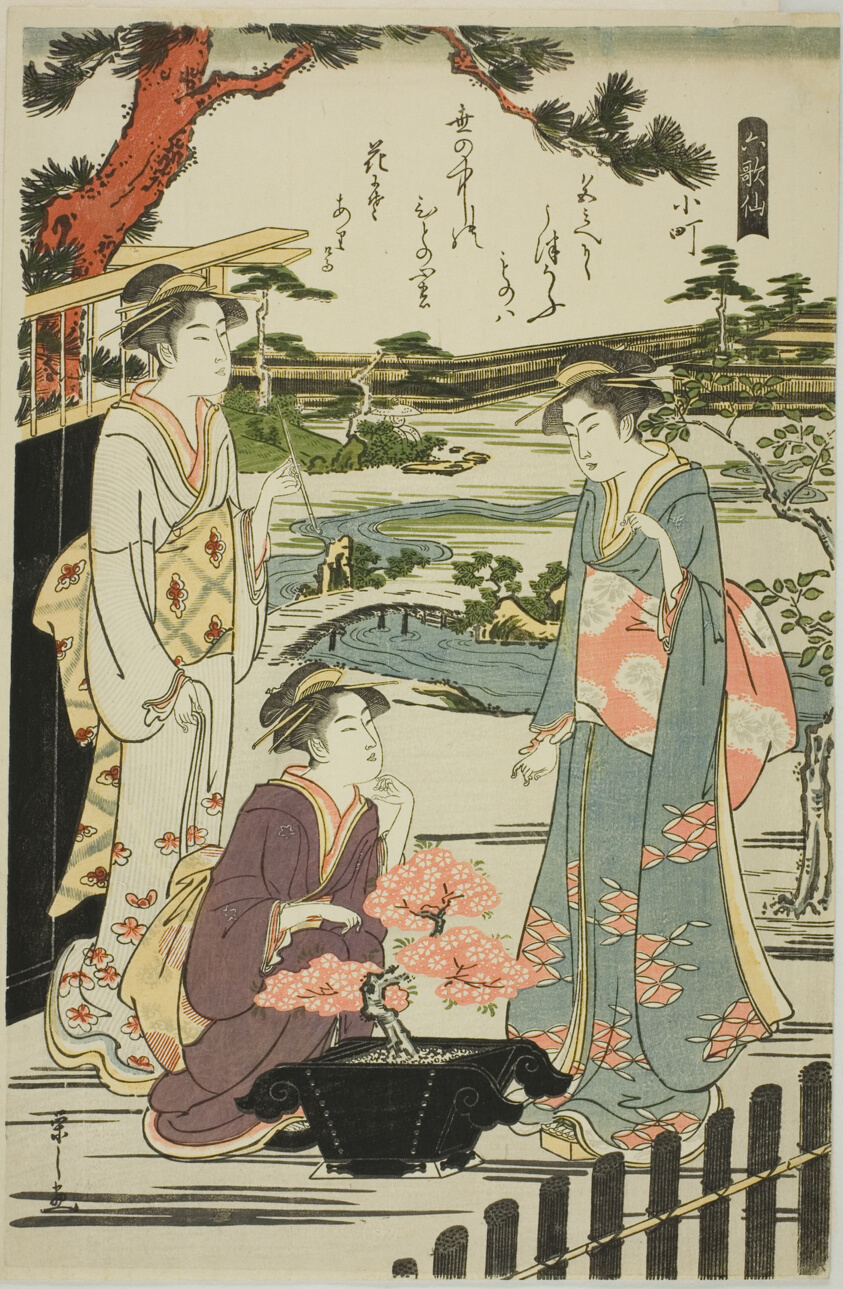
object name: Print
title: Komachi, from the series "Six Immortal Poets (Rokkasen)"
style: Japanese (culture or style)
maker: Chobunsai Eishi; Japanese, 1756-1829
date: c. 1789/90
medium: Color woodblock print; oban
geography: Japan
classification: woodblock print; print; asian art